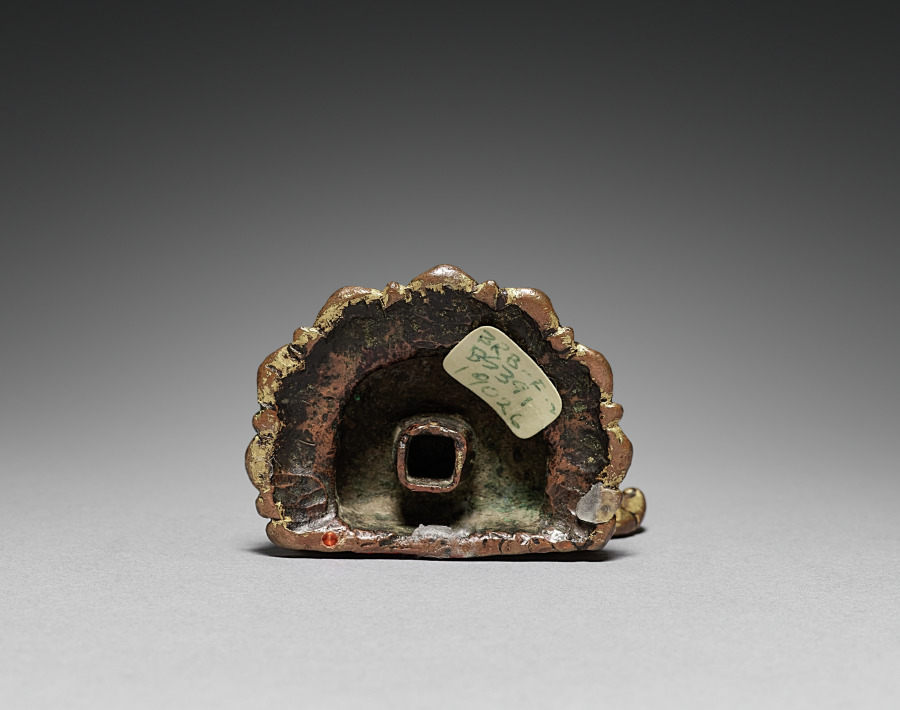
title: Standing Tara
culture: Nepal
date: 1300s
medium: bronze, gilded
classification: Sculpture